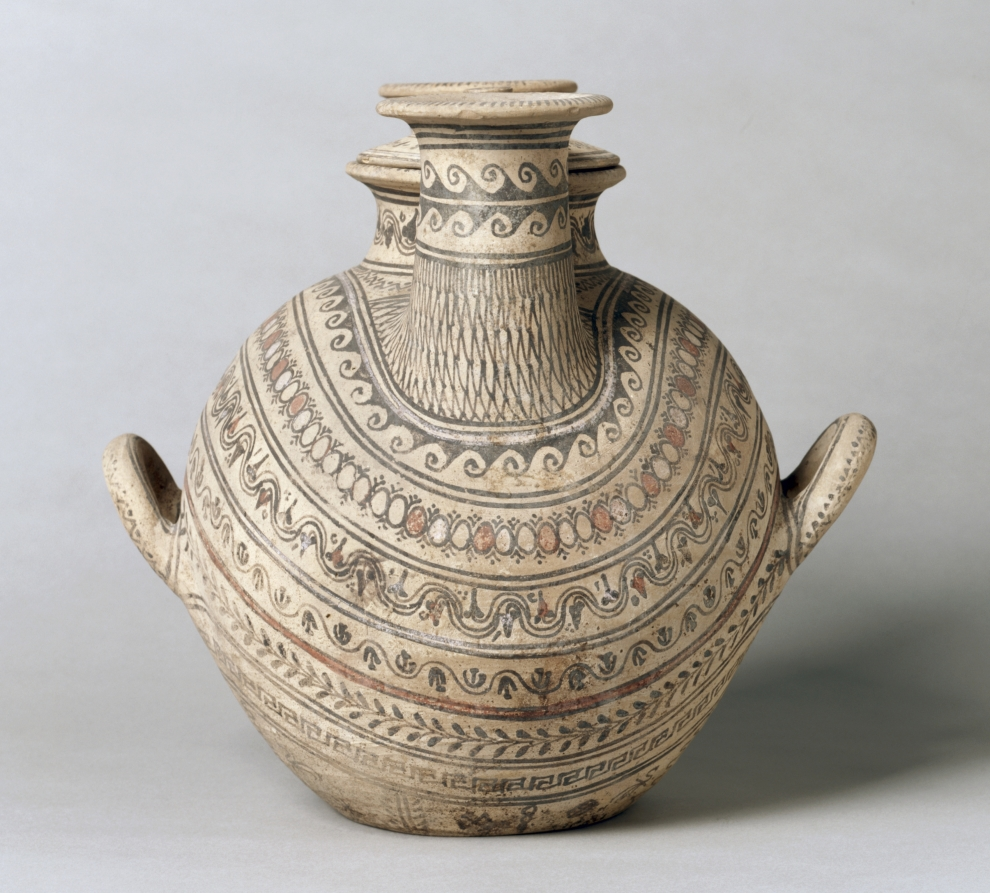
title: Two-Spouted Strainer Askos (Flask) with Lid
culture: South Italian, Daunian or Canosan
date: 300–200 BCE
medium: ceramic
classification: Ceramic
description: Although now referred to by the Greek term askos, because of its resemblance to the animal skins used to hold wine in ancient Greece, this ceramic shape developed in the South Italian region of Daunia (north of Apulia, on the Adriatic coast). This example is unusual for its three openings—one covered by a lid, the others spouted with built-in strainers. Its profusely painted decoration, mostly geometric and vegetal patterns applied in black with added red and white, is arranged in bands that follow the contours of the vessel.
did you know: Each spout has a built-in strainer—one near the top, the other near the bottom.